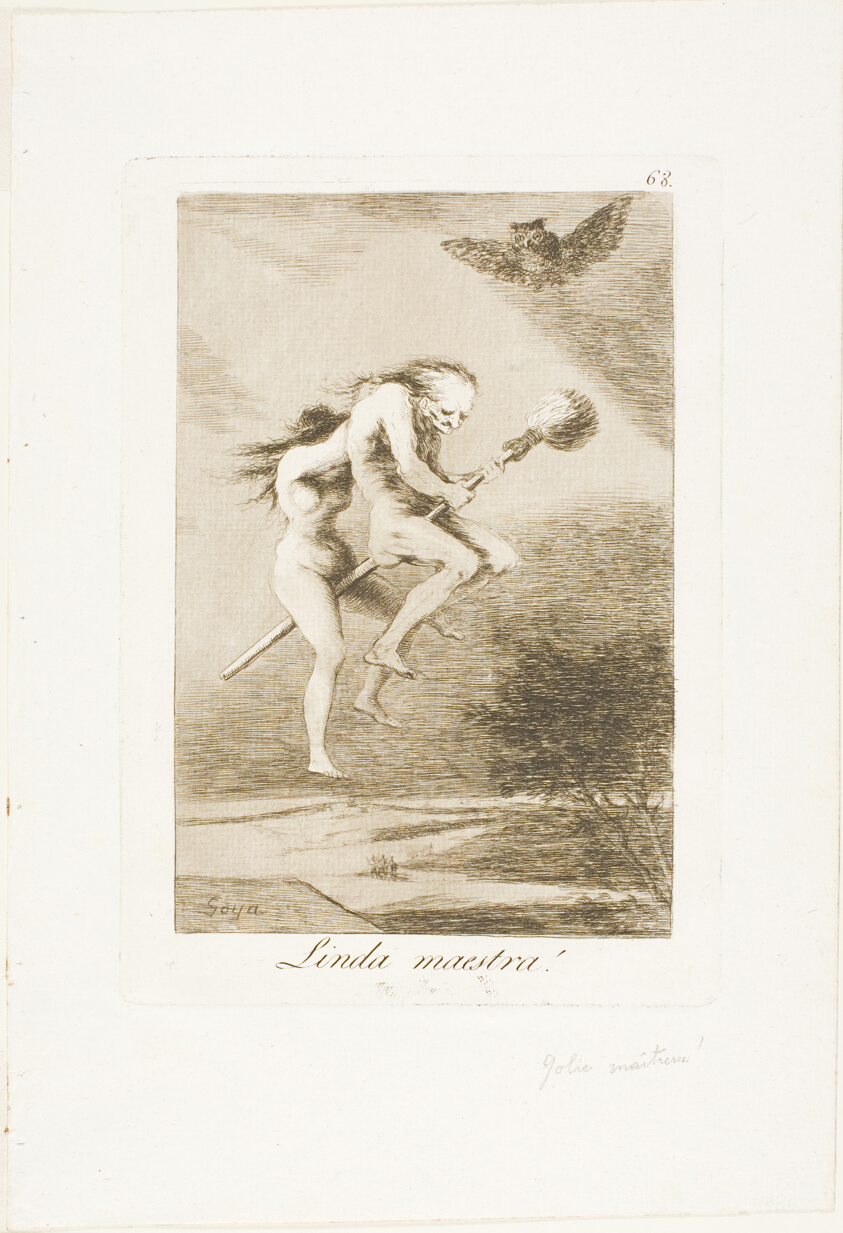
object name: Print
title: Pretty Teacher!, plate 68 from Los Caprichos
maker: Francisco José de Goya y Lucientes (Spanish, 1746-1828)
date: 1797/99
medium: Etching and aquatint on ivory laid paper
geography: Spain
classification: etching; print; prints and drawing